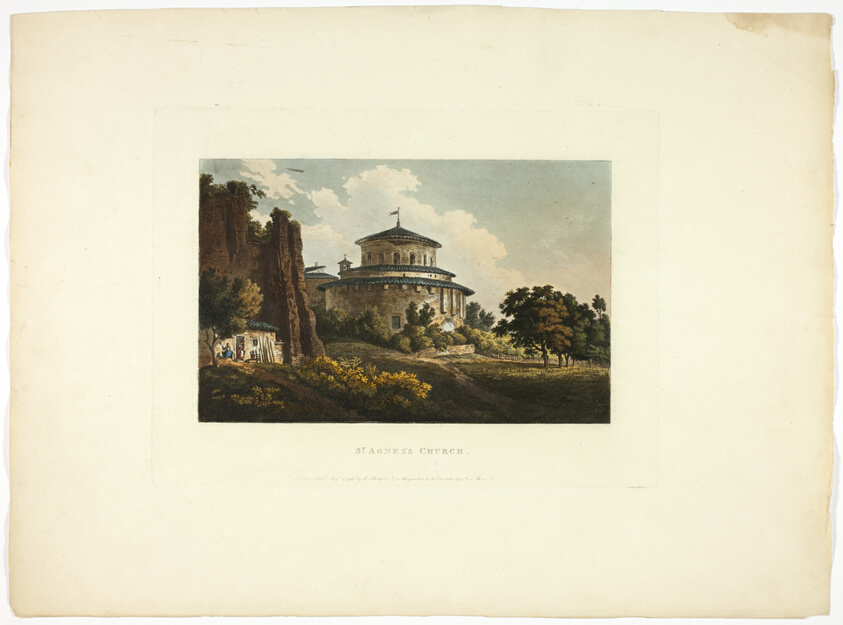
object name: Print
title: St. Agnes's Church, plate eight from the Ruins of Rome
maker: M. Dubourg, (English, active 1786-1838); published by J. Merigot (Italian, Unknown)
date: published August 4, 1796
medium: Hand-colored aquatint on paper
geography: England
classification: aquatint; print; prints and drawing